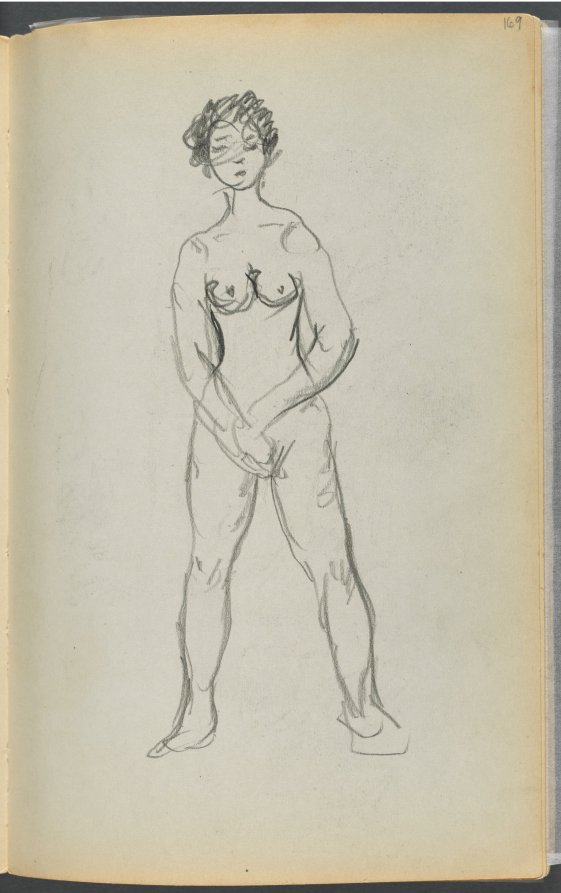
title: Sketchbook- The Granite Shore Hotel, Rockport, page 169: Female Nude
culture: America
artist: Maurice Prendergast (American, born Newfoundland [now Canada], 1858–1924)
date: 1905–10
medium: graphite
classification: Bound Volume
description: This sketchbook contains 72 pages of pencil drawings and 9 watercolors of Cape Ann. On the inside of the cover Prendergast wrote the address of the Granite Shore Hotel in Rockport, Massachusetts.